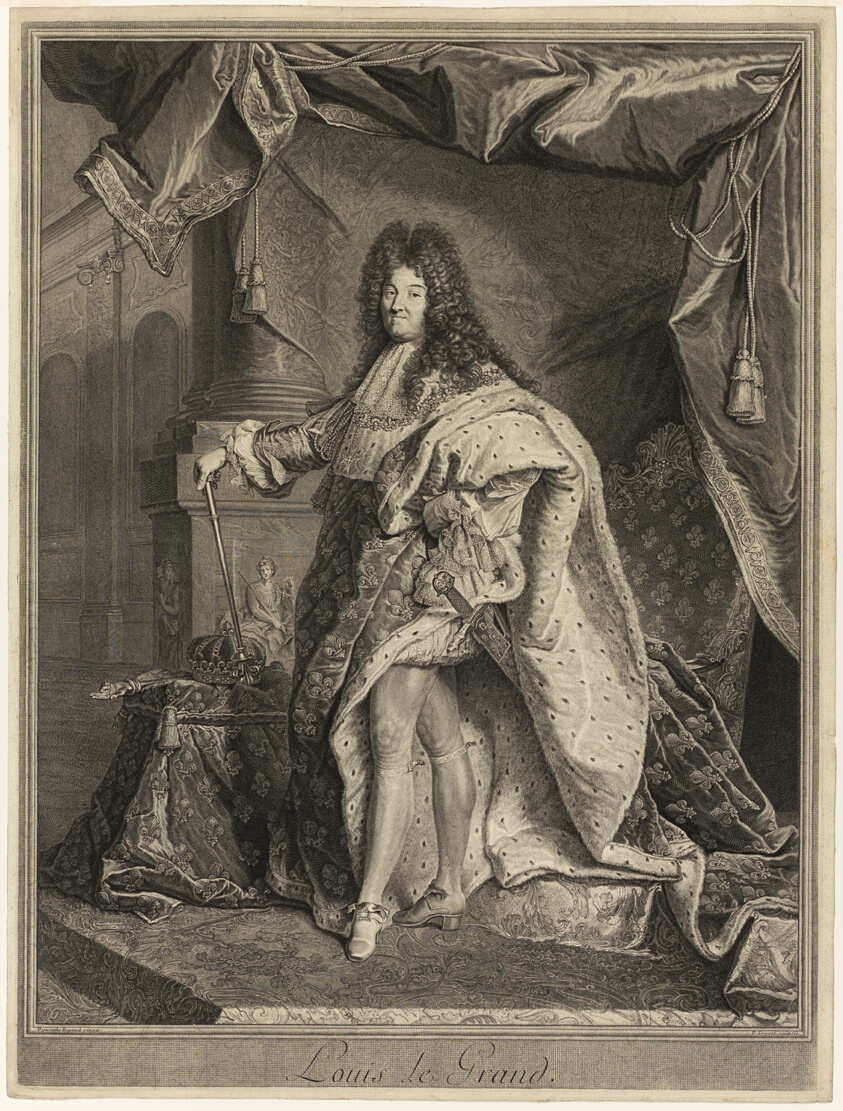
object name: Print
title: Portrait of Louis XIV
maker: Pierre Drevet (French, 1663-1738); after Hyacinthe Rigaud (French, 1659-1743) and Jean-Marc Nattier (French, 1685-1766)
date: 1712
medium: Engraving on ivory laid paper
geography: France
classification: engraving; print; prints and drawing